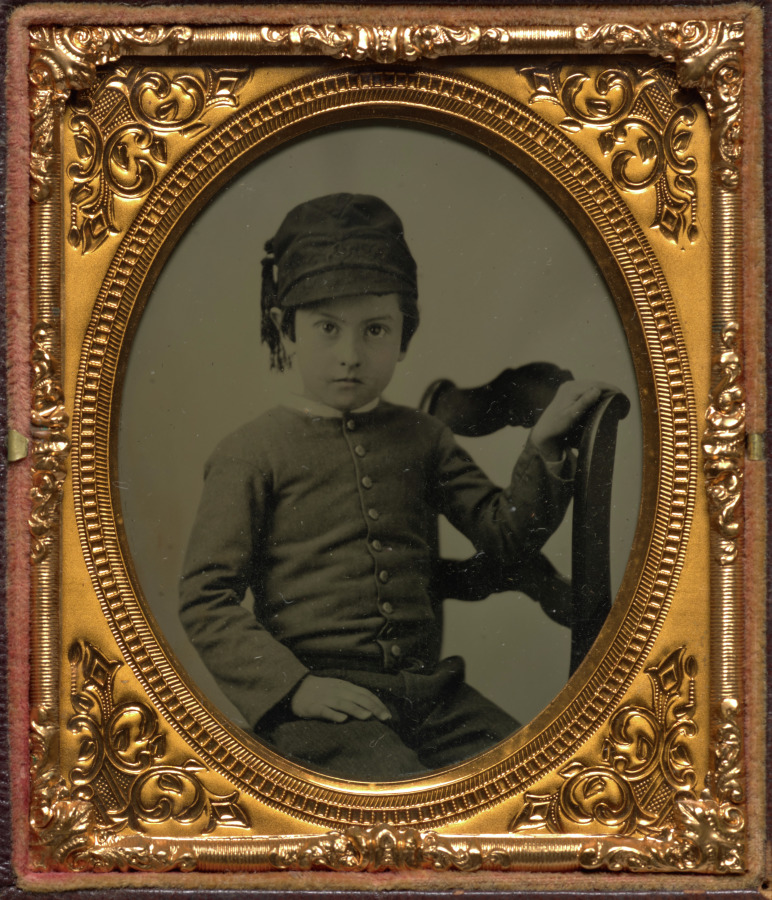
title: Seated boy in tasseled cap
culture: America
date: c. 1858–61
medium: ambrotype, sixth plate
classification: Photograph